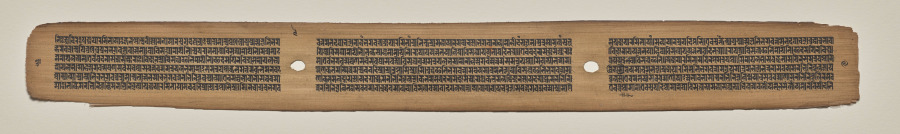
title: Text, Folio 9 (verso), from a Manuscript of the Perfection of Wisdom in Eight Thousand Lines (Ashtasahasrika Prajnaparamita-sutra)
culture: Eastern India, Bihar, Vikramashila Monastery. Painting: Nepal, Kathmandu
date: Sunday, September 14, 1119 (year 239 of the Newar Samvat in the month of Ashvina)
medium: gum tempera and ink on palm leaves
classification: Painting